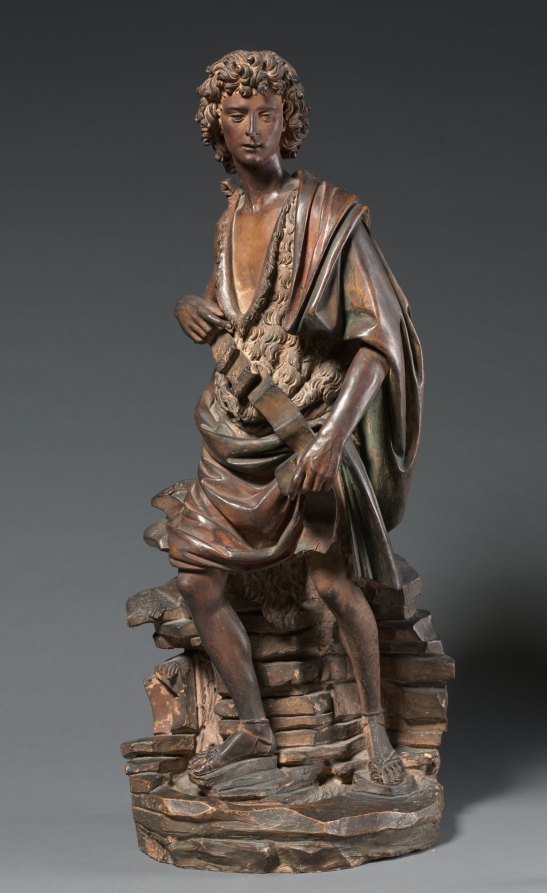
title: Saint John the Baptist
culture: Italy, Florence, 16th century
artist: Master of the Saint John Statuettes (Italian)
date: c. 1500–1525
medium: terracotta with traces of polychromy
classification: Sculpture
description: This statuette belongs to a group of terracotta sculptures representing David (from the OldTestament) and Saint John (from the New Testament) produced by a still unidentified Florentine artist and his studio in the late 1400s and early 1500s. Giventheir scale, it seems likely that these sculptures were intended for use in private homes rather than churches.